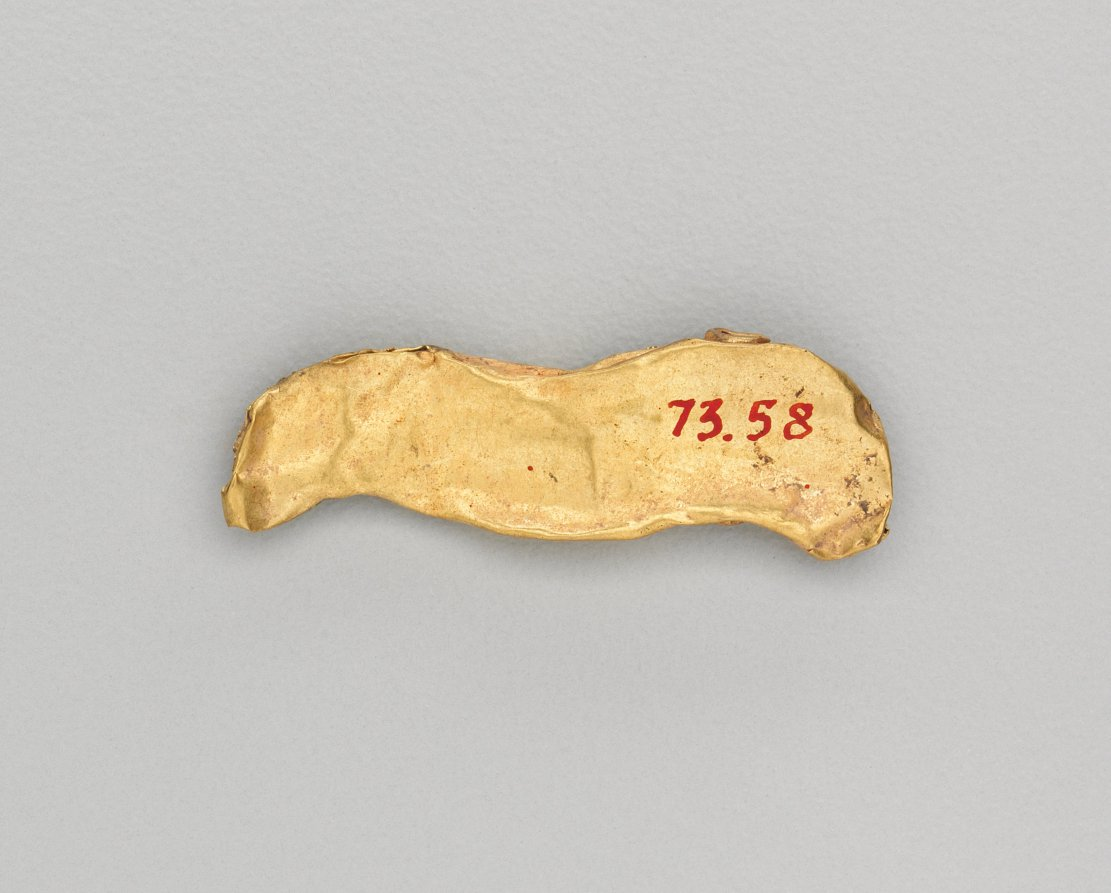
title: Set of Pendants Ending in a Bull's Head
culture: India, Shunga period (185–78 BCE)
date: 185–72 BCE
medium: gold repoussé with granulation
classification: Jewelry